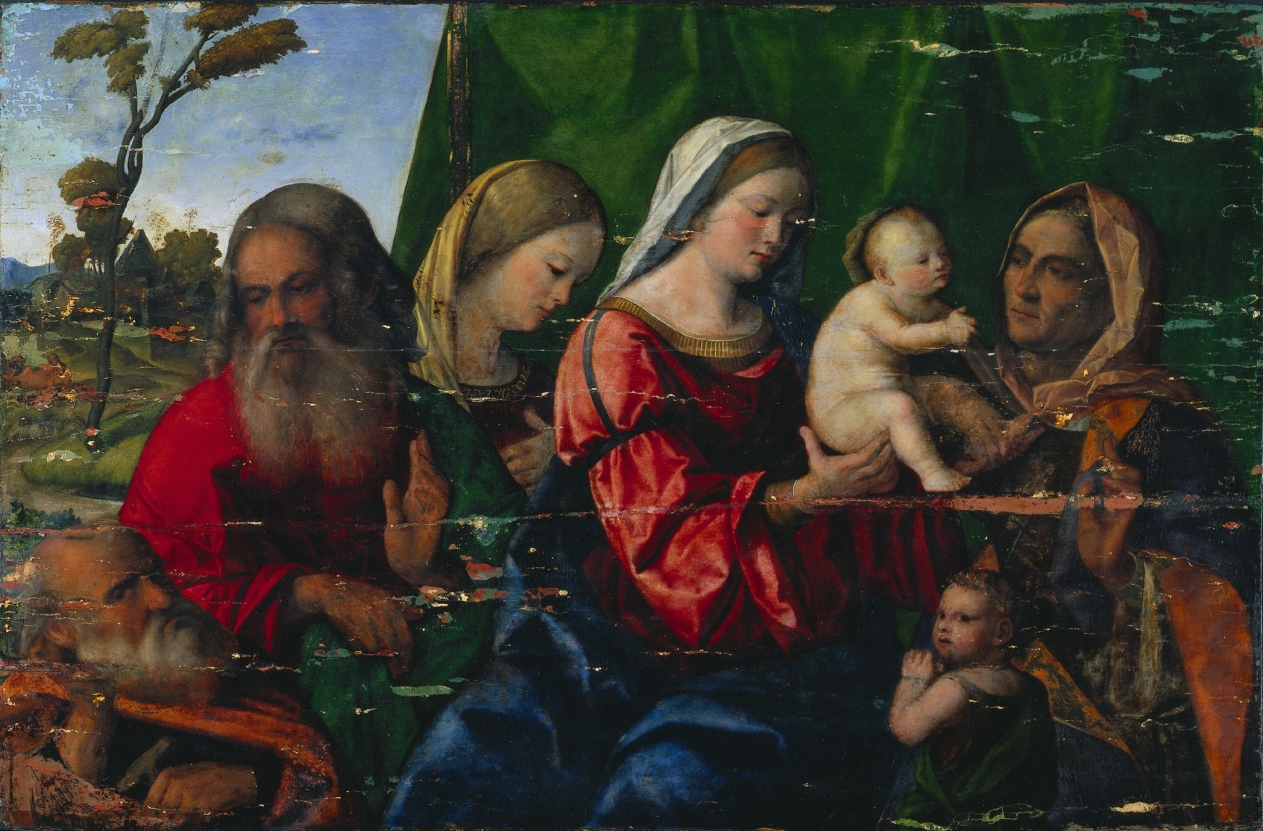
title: Virgin and Child with Saints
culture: Italy, Venice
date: c. 1510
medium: oil on wood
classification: Painting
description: What are some of the key steps in conserving this picture? While it may seem disturbing, the condition of this work is not unusual for a 16th-century panel painting. Treatment was abandoned decades ago when the conservator who was cleaning the work left the museum. Brilliant colors and beautiful original passages remain, including expressive folds of red drapery and delicate flesh tones. New technical research could tell us more about how the panel was painted and subsequently treated. Identifying the artist is another key step that would help conservators reconstruct distinctive passages like hands and facial features. A painting by Francesco Bissolo in Munich (below) is closely related in subject and style and may provide some clues.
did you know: The Virgin Mary is often depicted wearing blue and red, symbolizing her purity and devotion.